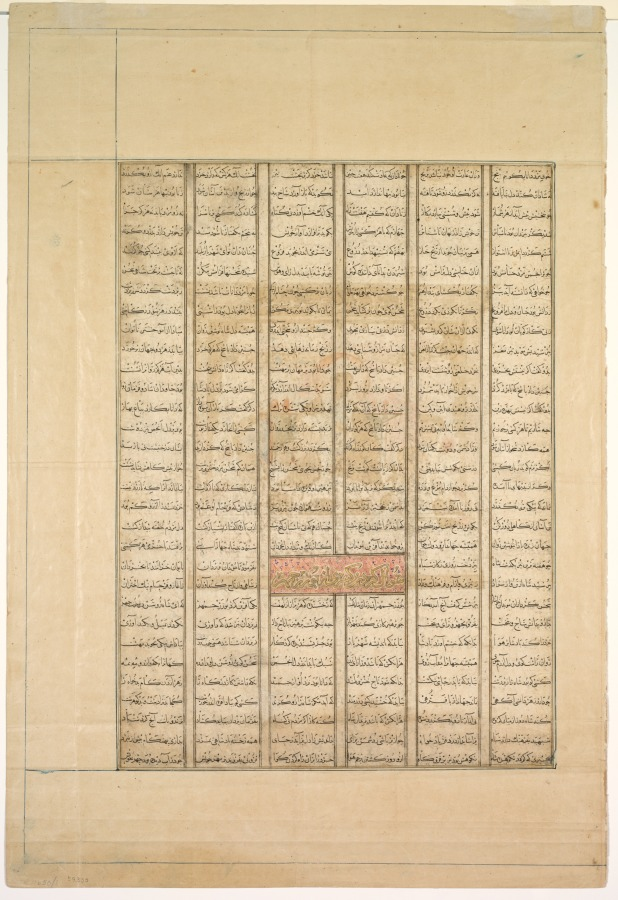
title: Persian Verses: The Fortieth Year of King Kisra Nushirwan's Reign and the Story of Buzurgmihr (recto) from a Shahnama (Book of Kings) of Firdausi (940–1019 or 1025)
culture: Iran, Tabriz, Ilkhanid period (1256-1353)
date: 1330–35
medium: Ink and opaque watercolor on paper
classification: Manuscript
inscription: Script: Naskh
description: Mongol interest in the production of illustrated manuscripts eventually focused on Persian epic poetry. The Shahnama, a compilation of the epics and tales of Iran's legendary heroes, was a natural choice; the book included many subjects that suited Mongol taste, such as banquets, battles, hunting, and magical or fantastic events. The painting on the other side of this page is of the Sasanian ruler of Iran, Khusraw I Anushirwan (531–579), descendant of Bahram Gur. Above the king's head an inscription reads, "Picture of Nushirwan the Just." The figure in the elaborate turban to the left of the king is probably the young Minister Buzurgmihr, famous for his wisdom and virtue. To celebrate the explanation of a troublesome dream by Buzurgmihr, Nushirwan held a series of seven banquets. The text around this painting describes the fifth banquet.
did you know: The Mongol rulers of Iran placed high value on illustrated manuscripts, especially histories, and established royal library-workshops.